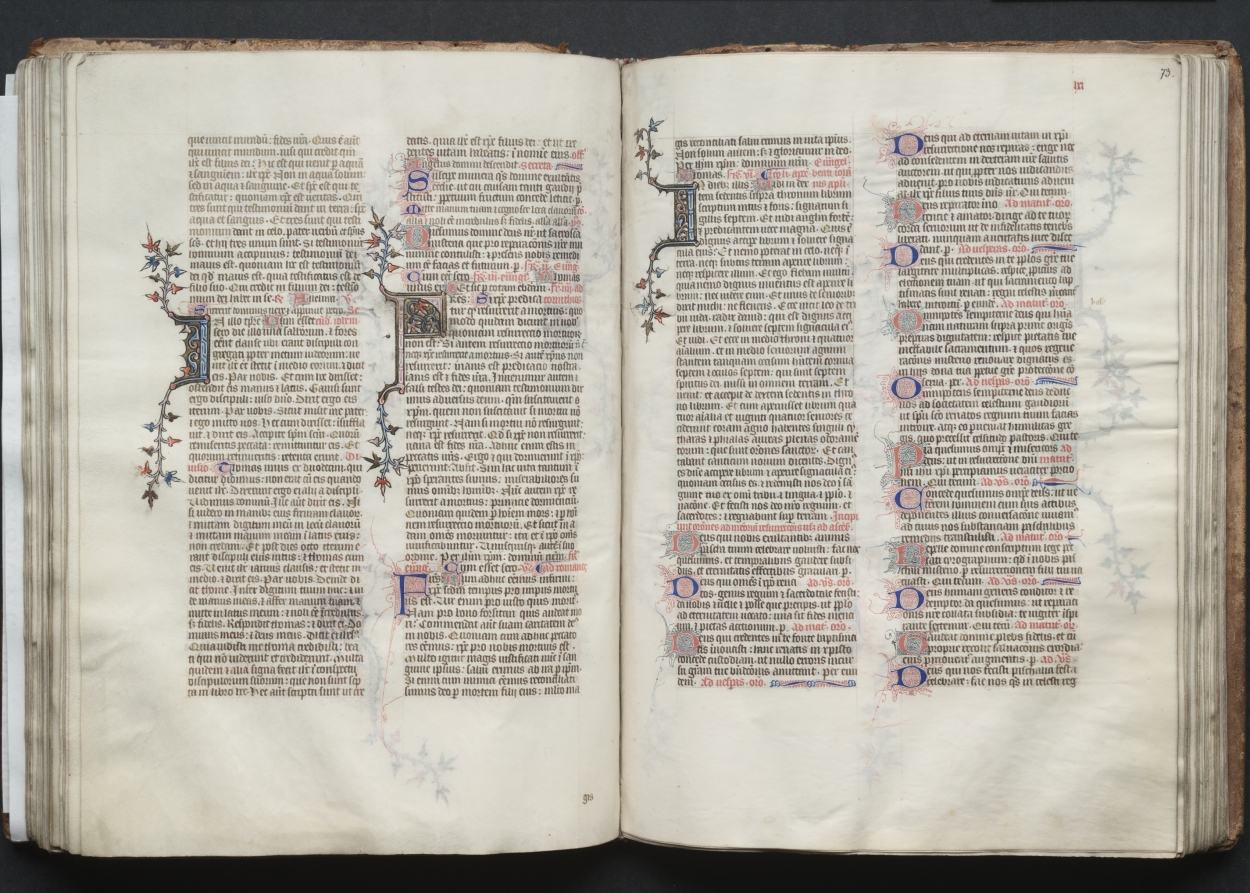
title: The Gotha Missal: Fol. 72v, Text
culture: France, Paris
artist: Master of the Boqueteaux (French)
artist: and Workshop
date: c. 1375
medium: ink, tempera, and gold on vellum; blind-tooled leather binding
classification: Bound Volume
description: The style and quality of this manuscript's decoration is typical of deluxe Parisian books made for aristocratic or royal patrons. Most of the book's decoration appears to be the work of the Master of the Boqueteaux, an artist active at the court of King Charles V (died 1380). His style was apparently shared by a number of book illuminators working in and around Paris. It is very possible that the Gotha Missal belonged to Charles V, but is not provable because the manuscript has no royal portraits and lacks a colophon. Given the book's magnificent decoration, however, it would seem that it was produced for a Valois prince, if not for the king himself. The manuscript receives its name from the German dukes of Gotha, its later owners.